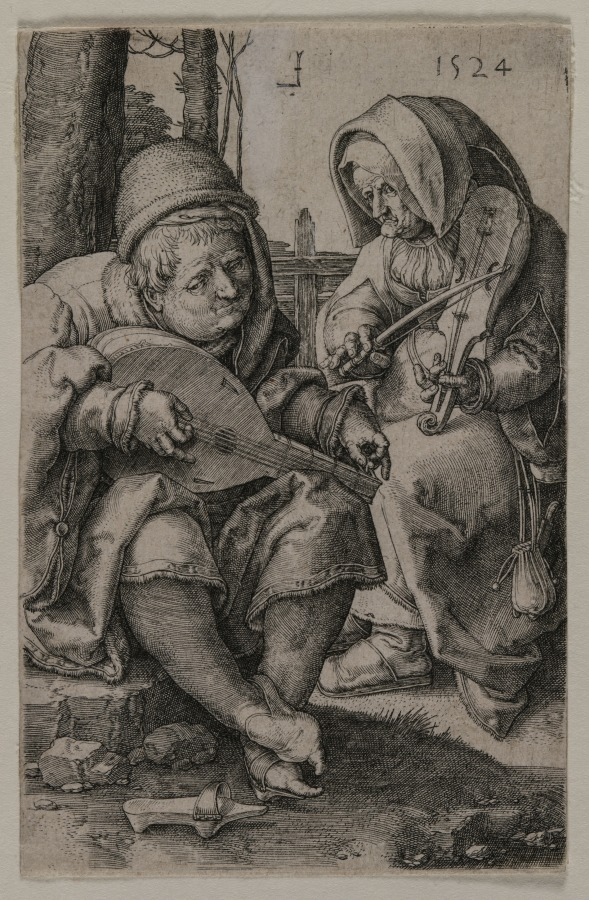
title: The Musicians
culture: Netherlands, 16th century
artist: Lucas van Leyden (Netherlandish, 1494–about 1533)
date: 1524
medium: engraving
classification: Print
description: A man tunes a lute with great concentration, plucking a single string with one hand and turning the tuning peg with the other. Close by, a woman bows a three-stringed rebec--an instrument tuned in fifths like a violin, usually used to play dance music. The costly braiding decorating the man’s coat, and his tight-fitting stockings and pointed wooden sandals suggest the clothing of the courtly class at end of the 15th century. The engraving has been interpreted as depicting marital harmony and longstanding fidelity.